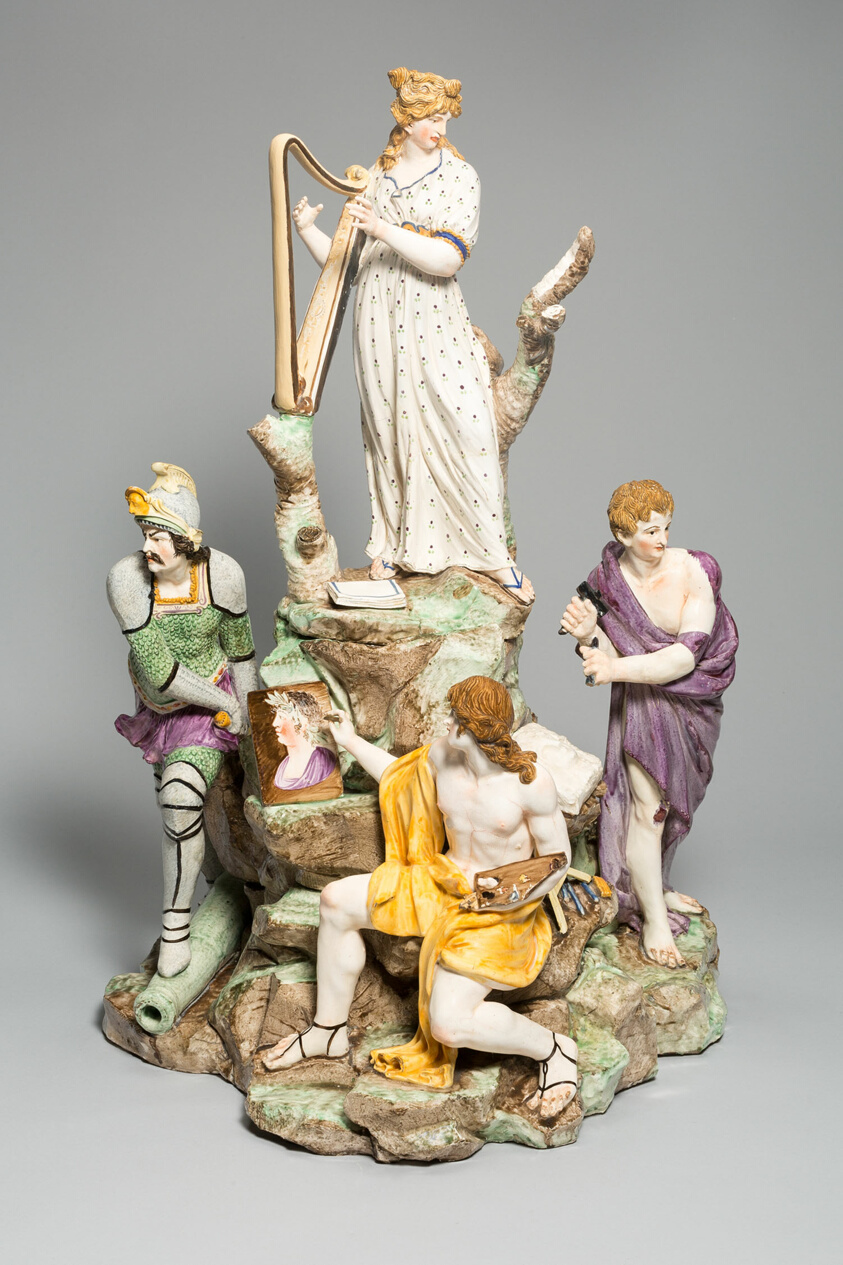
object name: Ceramics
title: Allegorical Figure Group: The Arts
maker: Buen Retiro Porcelain Factory (Spanish, 1759-1808)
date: 18th century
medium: Porcelain with polychrome decoration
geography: Buen Retiro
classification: sculpture; ceramics; porcelain; european decorative arts